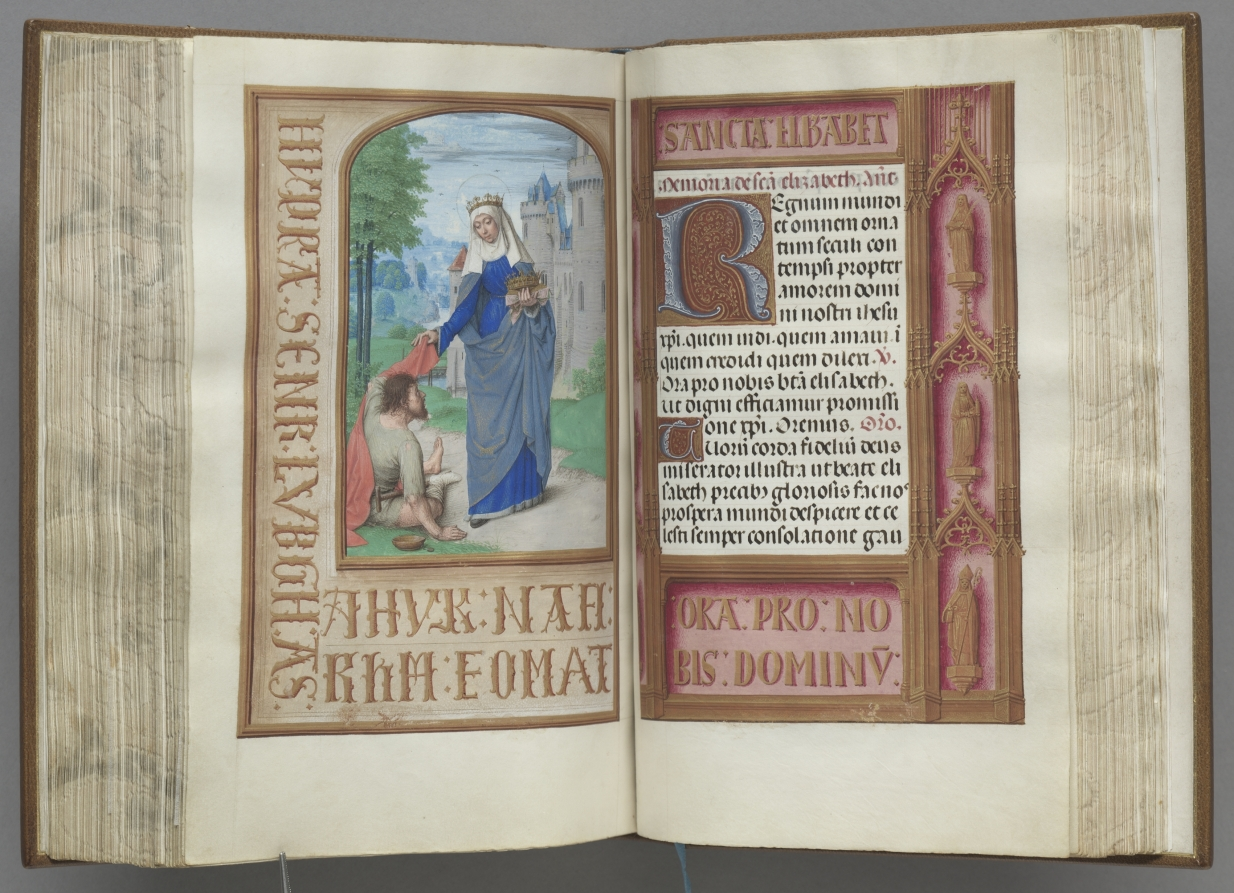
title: Hours of Queen Isabella the Catholic, Queen of Spain: Fol. 197v, St. Elizabeth of Hungary Clothing the Poor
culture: Flanders, Ghent and Bruges, late 15th century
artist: Master of the First Prayerbook of Maximillian (Flemish, c. 1444–1519)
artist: and Associates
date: c. 1500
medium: ink, tempera, and gold on vellum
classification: Bound Volume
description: This manuscript was illuminated by a circle of at least five highly organized manuscript painters active in the Flemish cities of Ghent and Bruges. The principal illuminator was Alexander Bening, who painted the majority of the book's miniatures. Manuscripts produced by this circle of artists are renowned for the decoration of their borders, which typically feature a rich variety of realistically-painted flowers, birds, and butterflies. This prayer book, called a book of hours, was intended not for a cleric, but for the private devotions of a lay person-in this case, Isabella the Catholic, Queen of Spain (1451-1504). Isabella's coat of arms embellishes the book's frontispiece. It is unlikely that the book was commissioned by the Queen herself; rather, she probably received it as a diplomatic gift from someone courting her patronage, perhaps Cardinal Francisco Jimenez de Cisneros. A Franciscan friar, Jimenez was dependent upon Isabella for his advancement, first to the post of Queen's confessor in 1492, and then to Archbishop of Toledo in 1495.